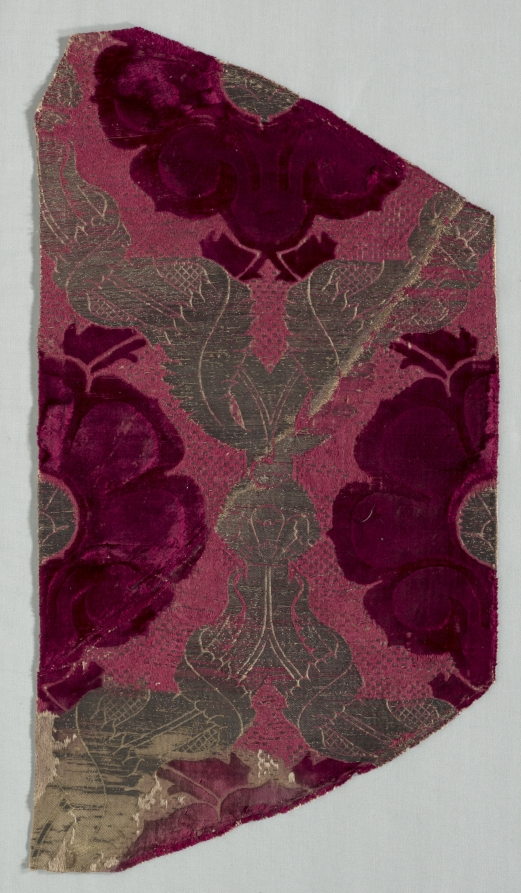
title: Velvet Fragment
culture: Italy, second half of 15th century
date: 1450–1499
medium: velvet (cut, voided, and brocaded): silk and gold thread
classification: Velvet